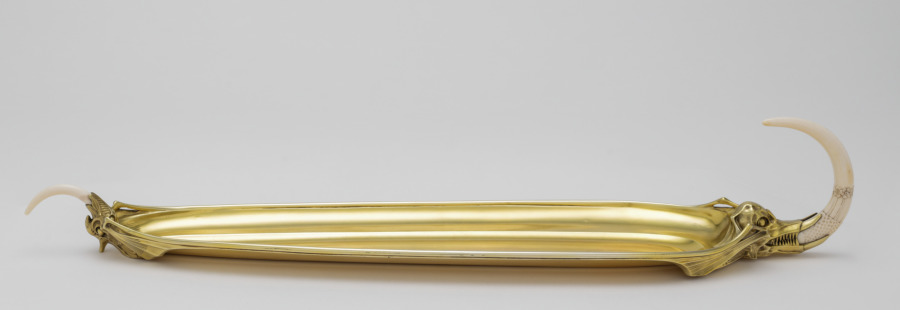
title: Tray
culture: France, Paris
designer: Carlo Bugatti (Italian, 1856–1940)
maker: Adrien-Aurélien Hebrard (French, 1866–1937)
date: c. 1907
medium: Gilt silver and ivory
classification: Silver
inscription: Made by A. A. Hebrard Firm, Paris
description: This tea and coffee service, salver, and table, together with some now missing cups, were all designed by Carlo Bugatti as an ensemble and presented at the 1902 exposition devoted to decorative arts in Turin, Italy. The set was probably acquired from Bugatti's 1907 exhibition at the Galerie Hébrard in Paris by a wealthy South African widow, Anna Blake, who was living there at the time. Some of the animal and insect motifs suggest mythical beasts or the fossils of prehistoric animals. When Mrs. Blake returned to Cape Town, she took these and other pieces designed by Bugatti with her, and they remained in South Africa throughout her lifetime.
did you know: This tray is part of a tea and coffee service designed by Carlo Bugatti.